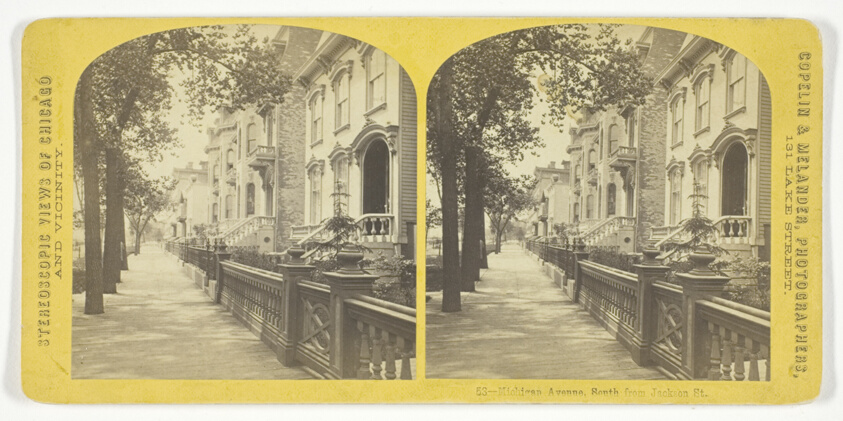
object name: Photograph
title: Michigan Avenue, South from Jackson Street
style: 19th century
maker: Copelin & Melander (American, active mid 19th century)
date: 1850/74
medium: Albumen print, stereo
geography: Chicago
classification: photography; photograph; albumen silver print; stereograph (albumen)